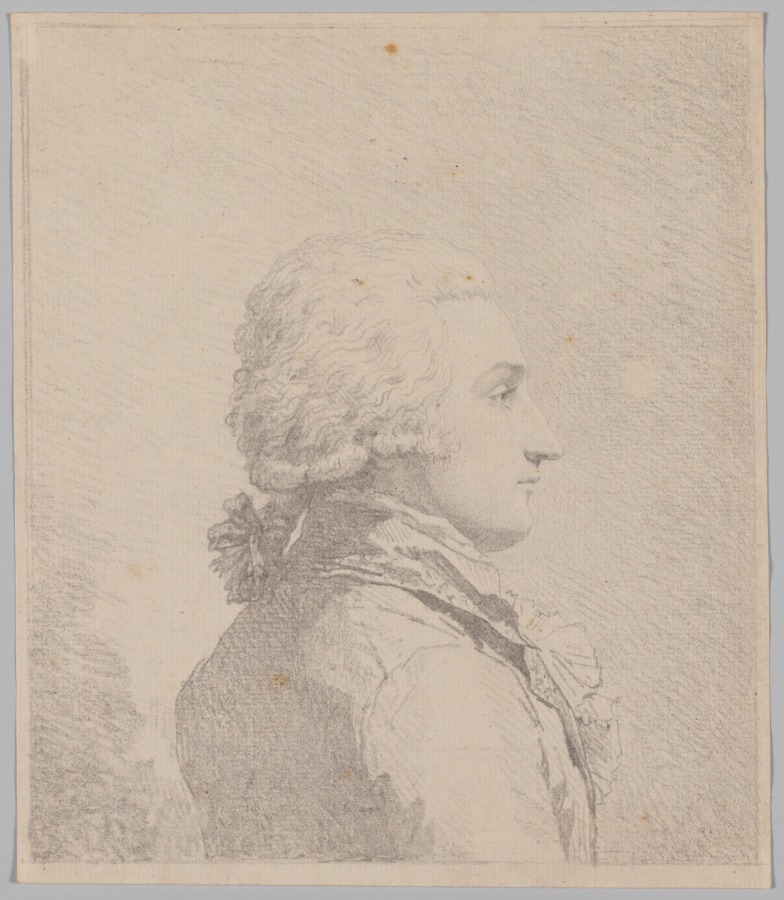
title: Profile Portrait of a Man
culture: France, 19th century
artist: attributed to Louis Rolland Trinquesse (French, c. 1746–c. 1800)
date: 18th century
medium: Black chalk counterproof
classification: Drawing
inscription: verso: lower right corner, in graphite: 798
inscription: mount, lower right, in graphite: Contre éprecue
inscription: verso of mount: center, in graphite: 798 / Ctm Epr. Trinquesse; upper left corner, in graphite: trinquessé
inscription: Countermark: center: J Honig / & / Zoonen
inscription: framer’s sticker: R. Charpentier/ 104.Ba Haussmann/ Paris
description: This portrait bust is a counterproof: the reverse image of a composition, made by placing blank paper on top of a drawing and transferring the design with pressure. Eighteenth-century artists frequently made counterproofs of their drawings to replicate their work. This process also enabled them to experience how their images would appear if they were reproduced as prints.